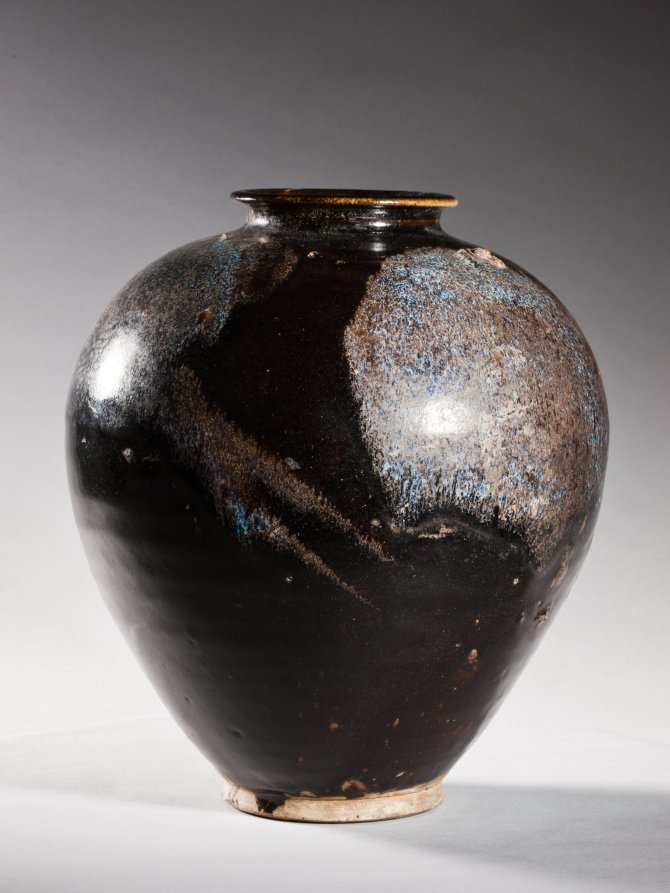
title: Jar: Black Ware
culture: China, Henan province, Huangdao kilns, Tang dynasty (618-907)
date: 700s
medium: glazed stoneware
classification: Ceramic